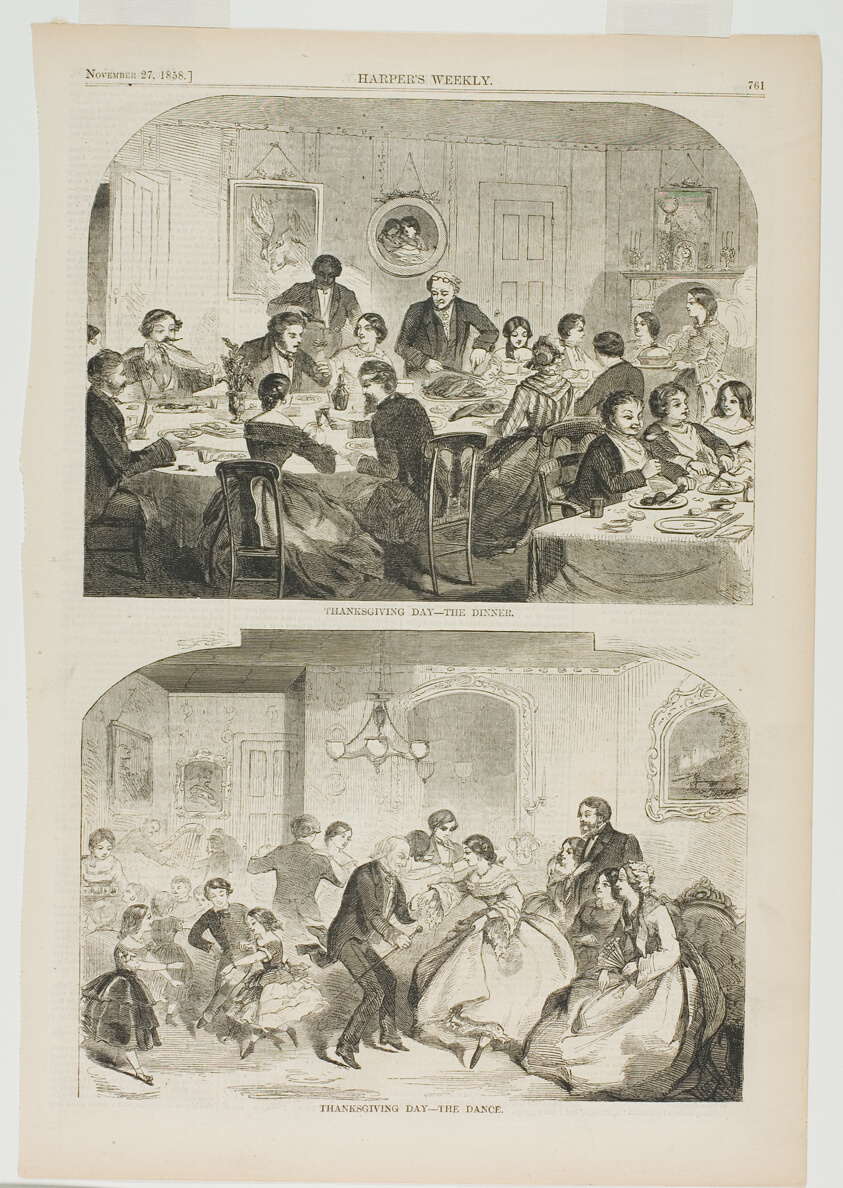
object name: Print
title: Thanksgiving Day—The Dinner and Thanksgiving Day—The Dance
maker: Winslow Homer (American, 1836-1910); published by Harper's Weekly (American, 1857-1916)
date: published November 27, 1858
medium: Wood engravings on paper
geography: United States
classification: wood engraving; print; prints and drawing